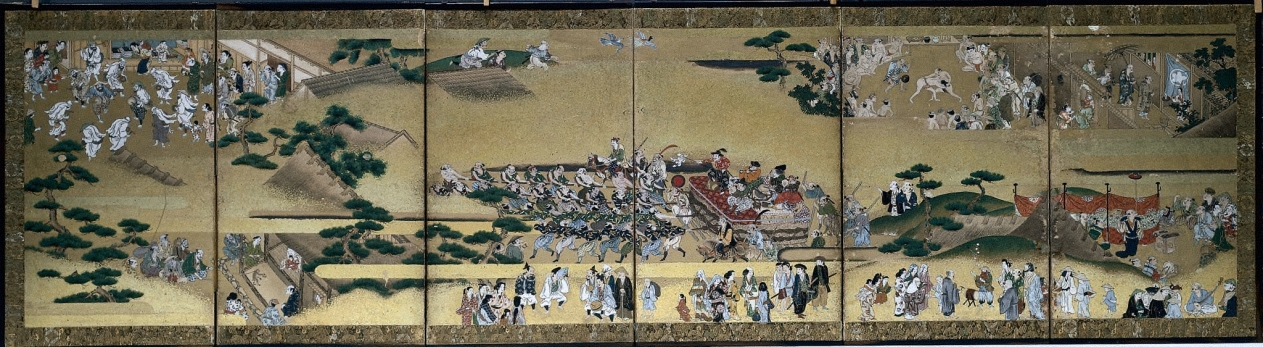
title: Festival Scenes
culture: Japan, Edo period (1615–1868)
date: 1600s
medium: one of a pair of six-panel folding screens; ink, color, gold, and gold leaf on paper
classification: Painting